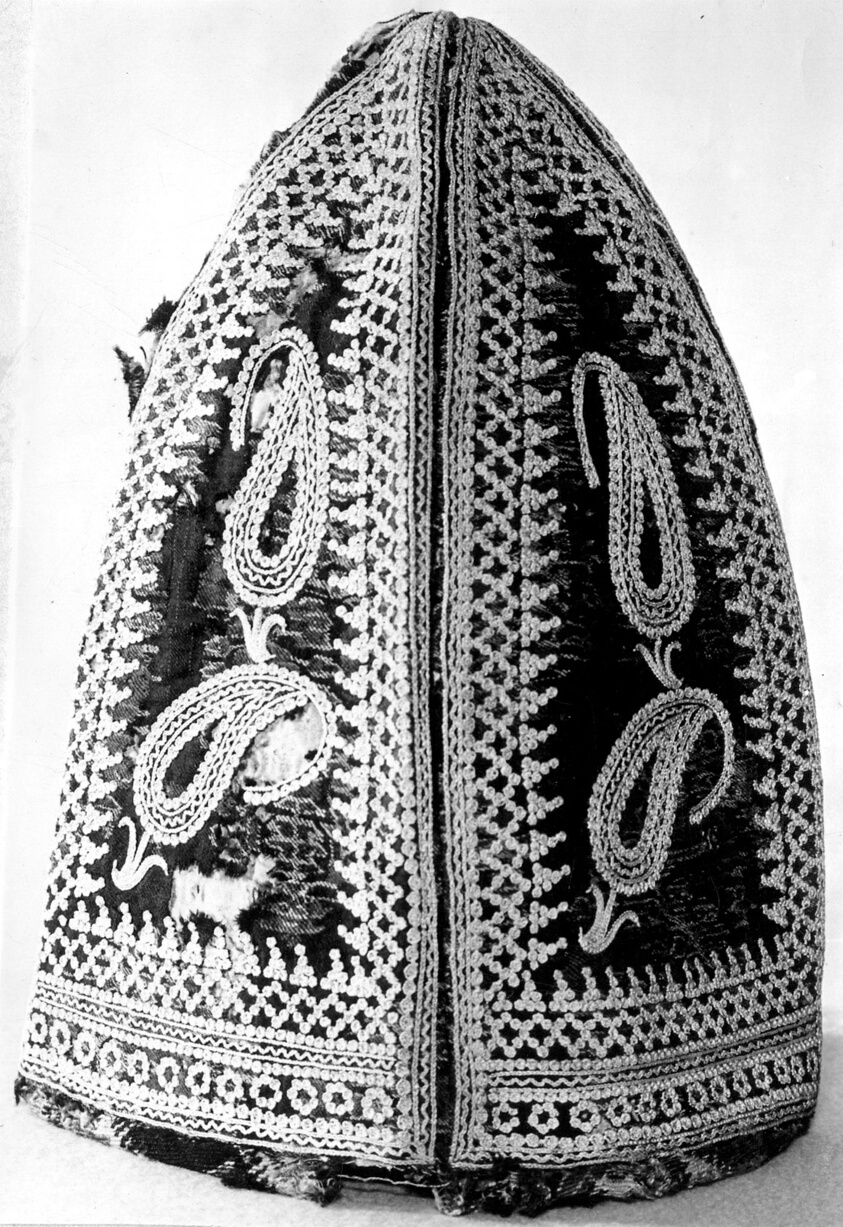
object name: Textile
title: Cap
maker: India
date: 19th century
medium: Design embroidered in chain stitch in white on shawl material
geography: India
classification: textile; costume accessory - headdress; needlework (visual works); headdress - misc; costume; dress (garment); clothing